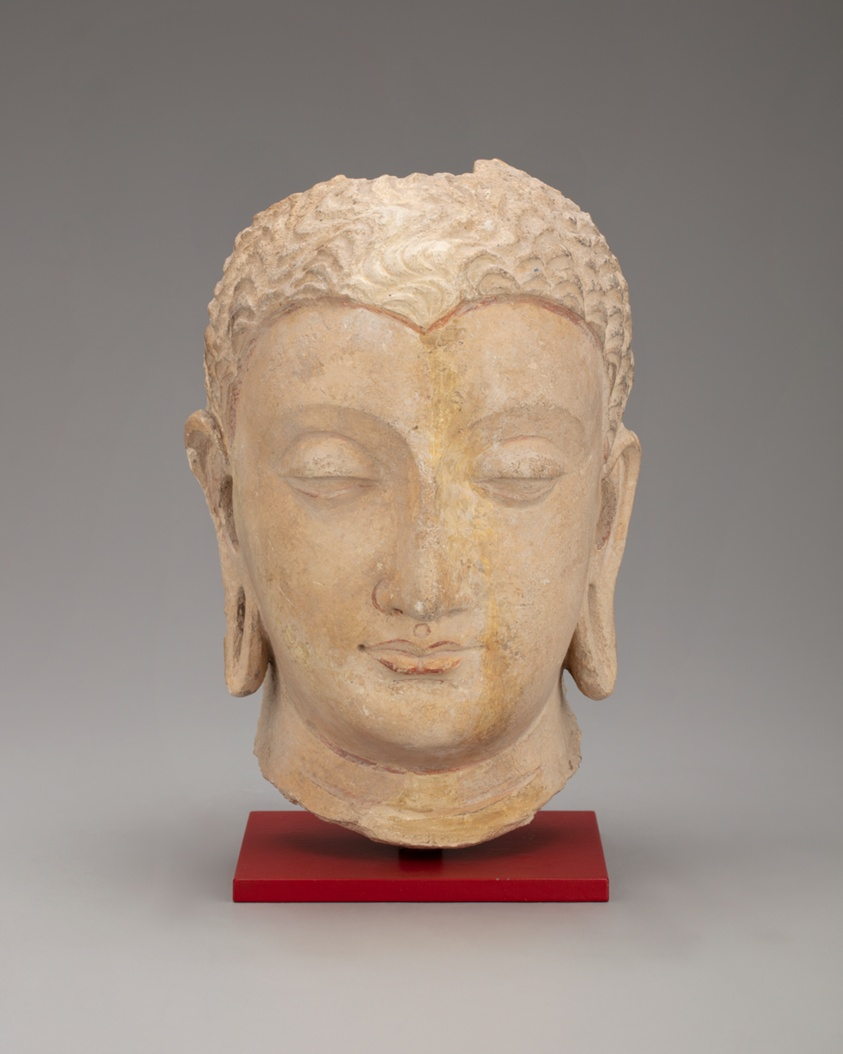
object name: Sculpture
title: Head of Buddha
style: South Asian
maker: Afghanistan or Pakistan; Ancient region of Gandhara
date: Kushan period, 3rd–5th century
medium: Stucco with traces of red pigment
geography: Gandhara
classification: bust/head; stuccowork; sculpture; asian art